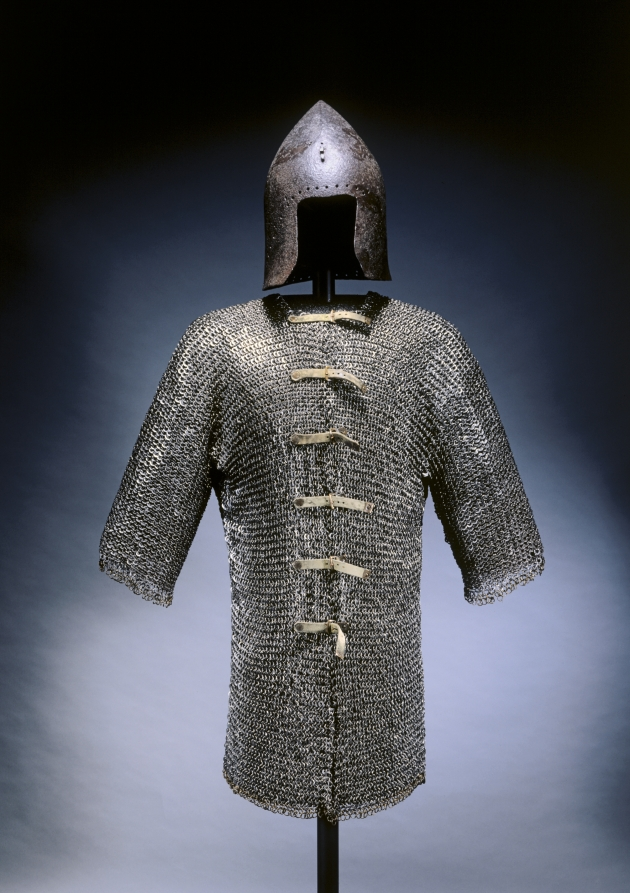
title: Hauberk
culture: Germany (?)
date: c. 1400–1450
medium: steel and brass rings, riveted with modern buckles and straps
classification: Arms and Armor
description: Mail armor was the predominant form of metal body defense for European knights until about 1350. The term derives from the Old French word maille (mesh), implying a protective textile. Each mail garment was constructed of small linked metal rings and "woven" for a specific part of the body. Mail for the torso is a hauberk and typically reached mid-thigh.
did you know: Mail was expensive to make and generally only available to warriors of noble birth unless it could be obtained as war booty.